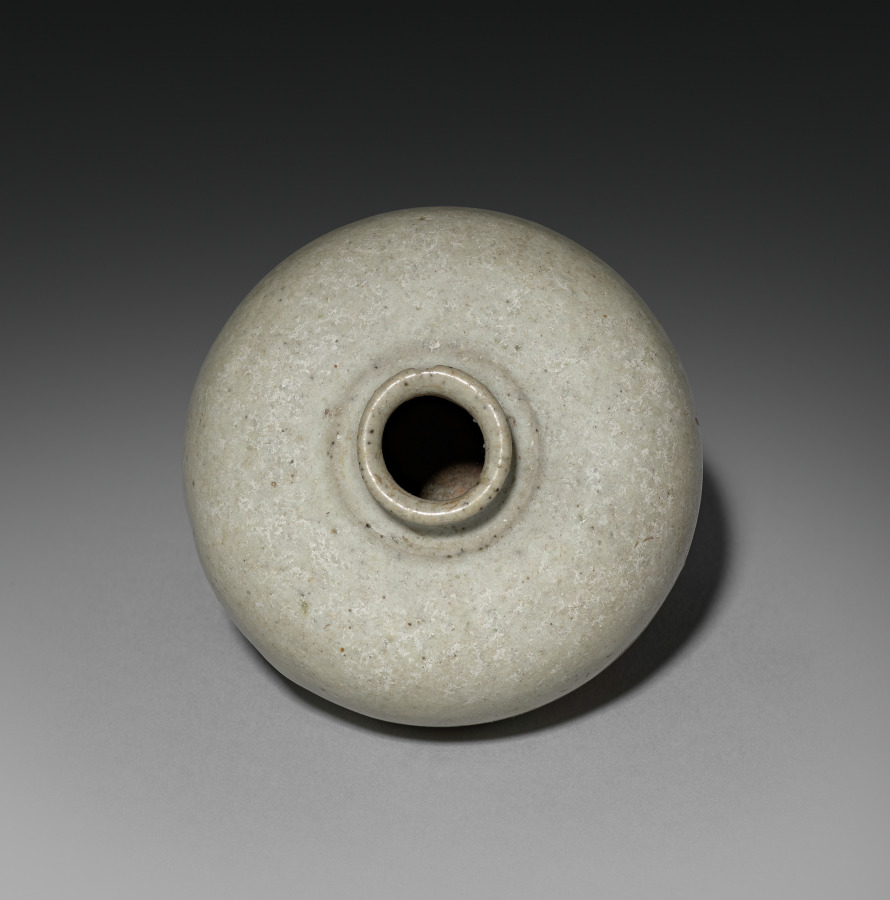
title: Bottle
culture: Siam, Sawankhalok ware, late 13th-14th Century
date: late 1200s-1300s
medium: stoneware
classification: Ceramic